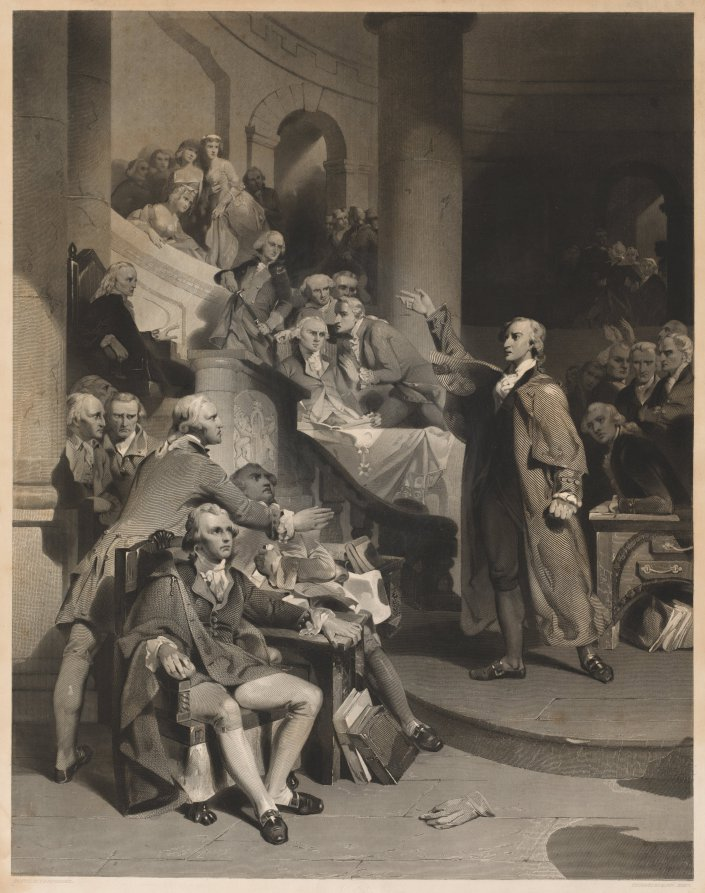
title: Patrick Henry Delivering His Celebrated Speech in the House of Burgesses, Virginia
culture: America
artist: Alfred Jones (American, 1819–1900)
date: 1852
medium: engraving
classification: Print